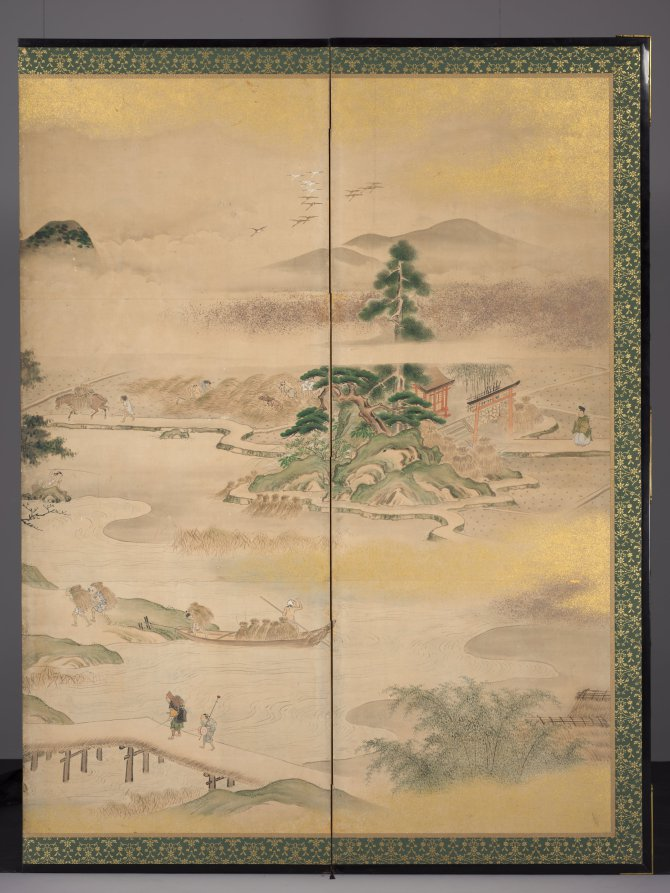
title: Spring and Autumn Farming (Autumn)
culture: Japan, Edo period (1615–1868)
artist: Kō Sūkoku (Japanese, 1730–1804)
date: 1700s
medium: Six-panel folding screen, ink, light color, gold, and silver on paper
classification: Painting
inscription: Signature of the artist: "Enrin san jin Rakushisai ko Sukoku ga" (each screen)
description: These screens present the cycle of the farming year, starting with spring at right and ending with fall at left. Close examination of these screens reveals moments of games and amusement, the enjoyment of meals as well as intellectual and spiritual pursuits interspersed among the scenes of cultivating and preparing the rice harvest. The artist Kō Sūkoku is considered the 18th-century heir in style and attitude to Hanabusa Itchō (1652–1724). Itchō’s work incorporated elements from Kano school, ukiyo-e, and literati styles of painting. Kō trained with one of Hanabusa’s pupils, Sawaki Sūshi, who was best known for scenes depicting everyday life and customs.